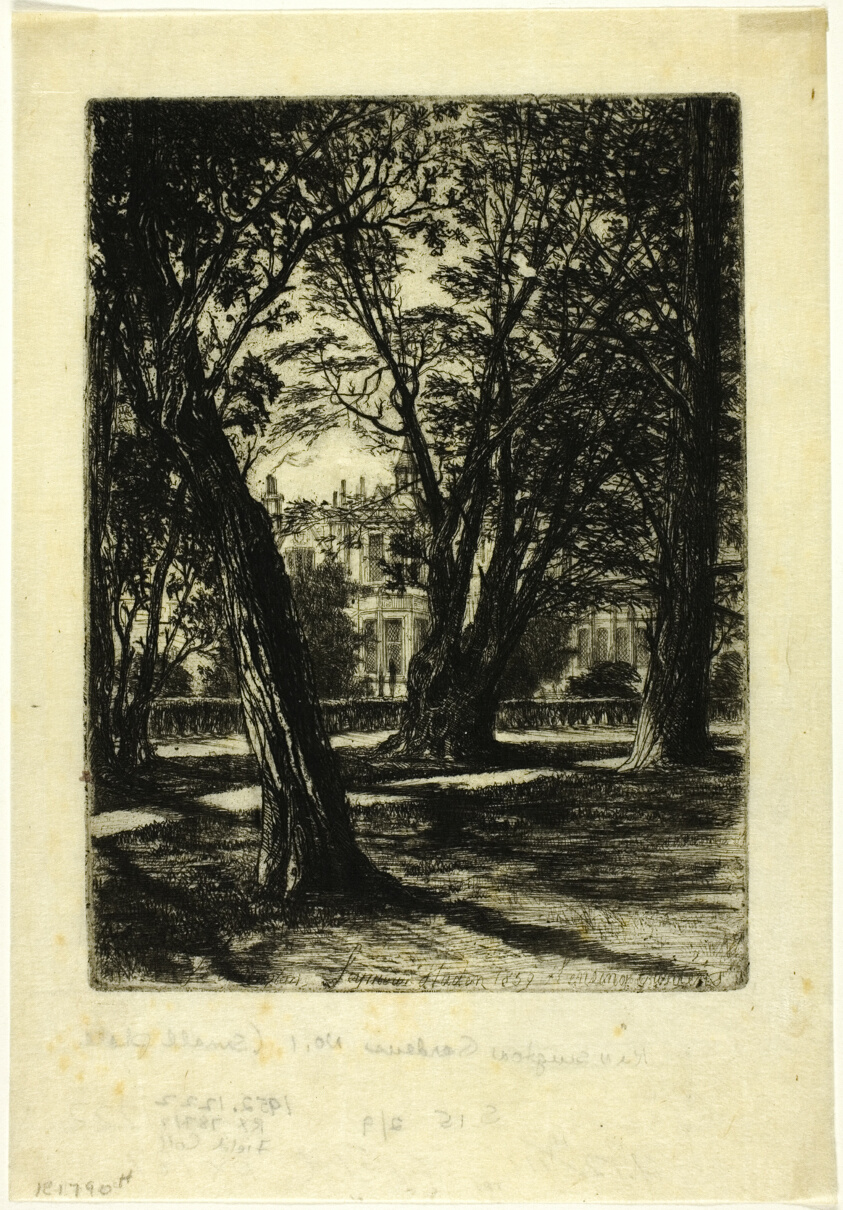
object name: Print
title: Kensington Gardens, No. I (small plate)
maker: Francis Seymour Haden (English, 1818-1910)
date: 1859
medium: Etching on ivory Japanese paper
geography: England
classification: etching; print; prints and drawing